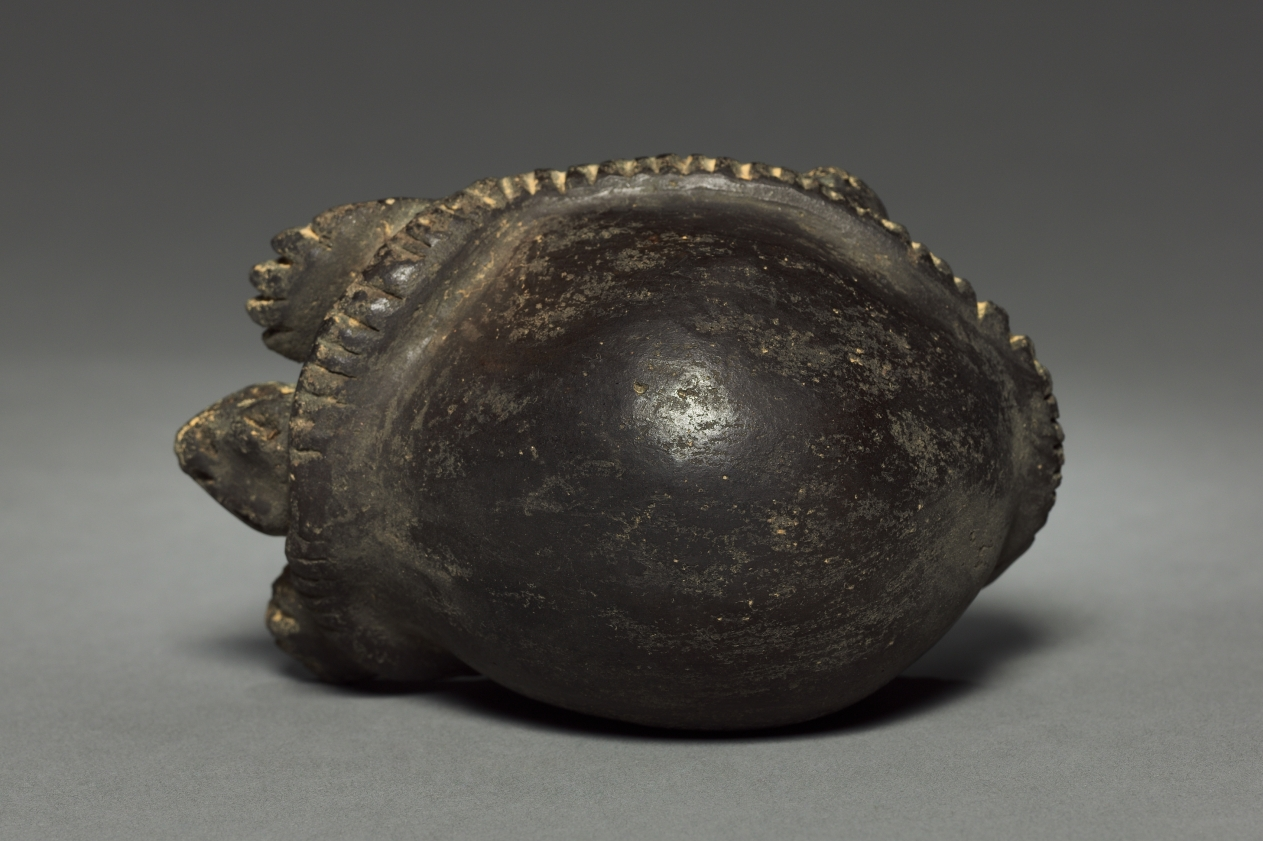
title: Turtle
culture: Colombia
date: before 1921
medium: pottery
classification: Ceramic